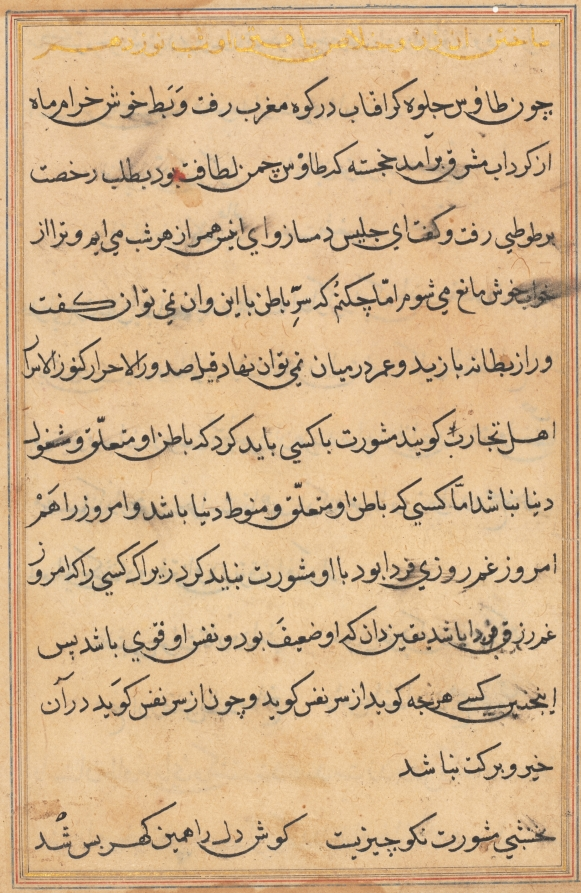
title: Page from Tales of a Parrot (Tuti-nama): text page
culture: Mughal India, court of Akbar (reigned 1556–1605)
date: c. 1560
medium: gum tempera, ink, and gold on paper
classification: Painting